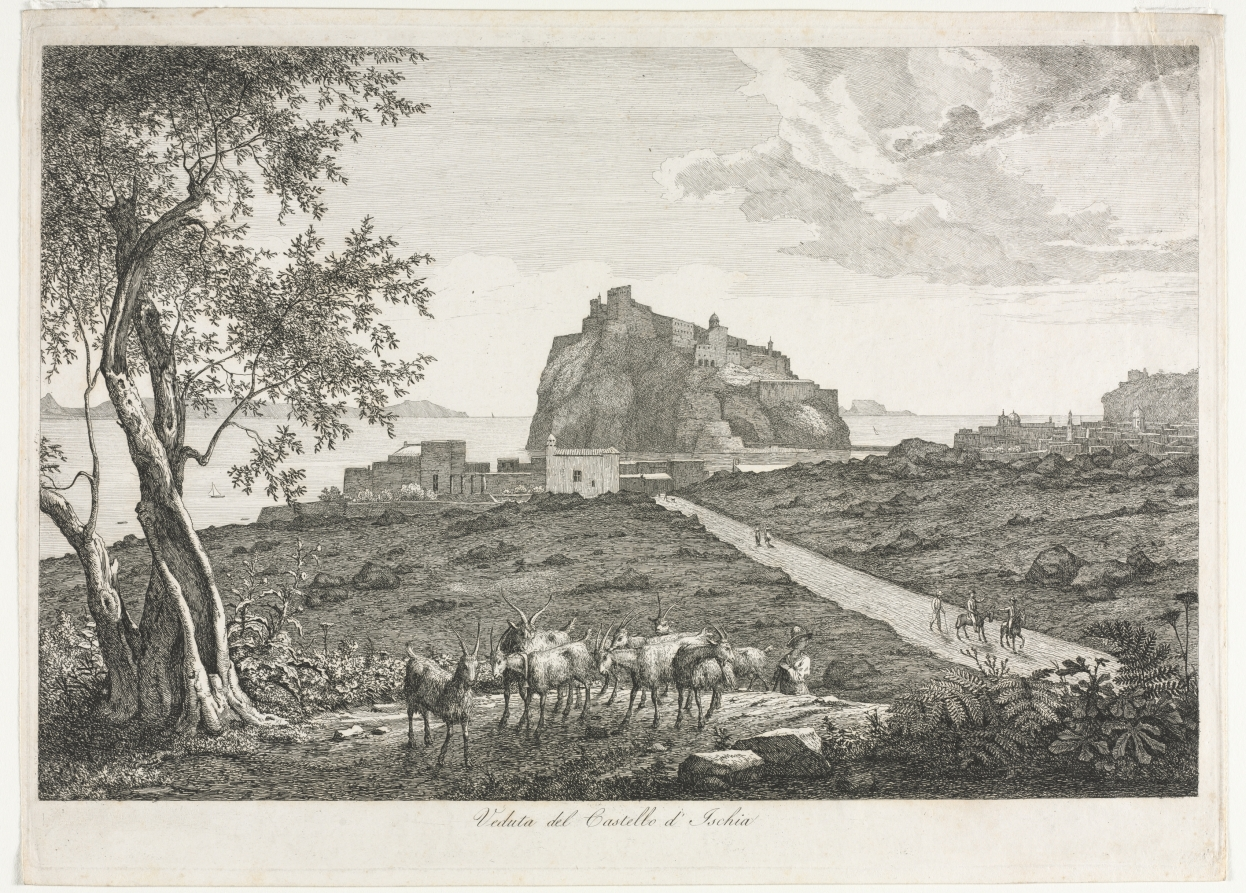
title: View of the Castello, Ischia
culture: Germany, 19th century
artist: Florian Grosspietsch (German, 1789–1840)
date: c. 1820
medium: etching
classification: Print